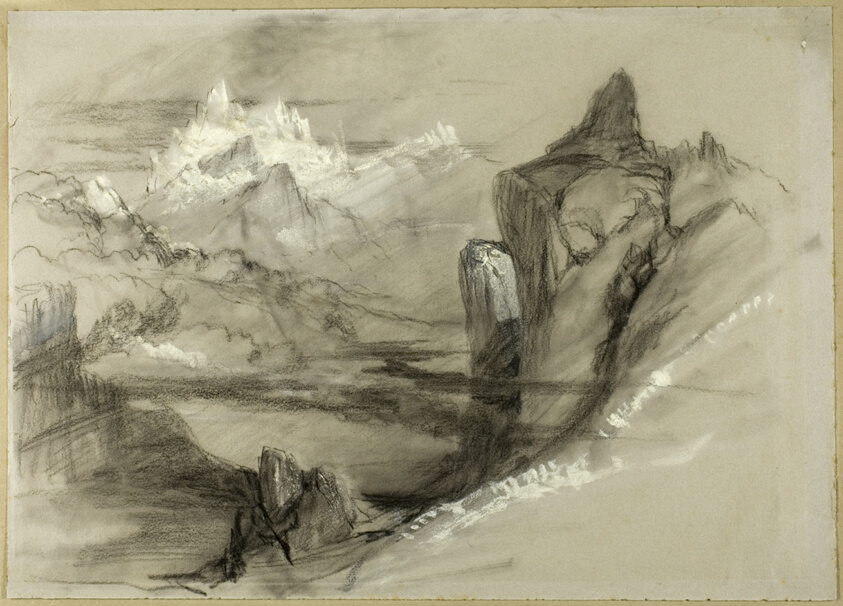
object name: Drawing and Watercolor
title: Mountain Landscape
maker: Attributed to John Ruskin; English, 1819-1900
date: 1834/73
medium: Black chalk, with stumping, brush and gray wash ,and white gouache, on gray wove paper, tipped onto green wove paper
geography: England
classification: chalk; drawings (visual works); prints and drawing